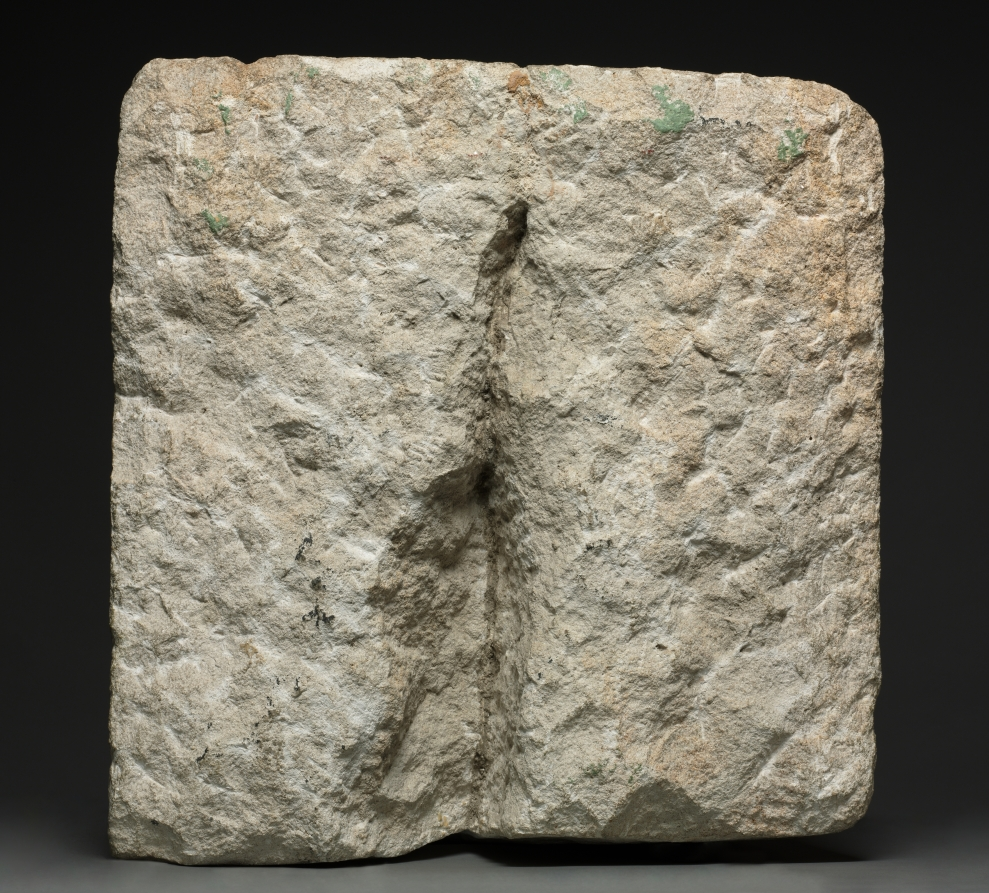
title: Engaged Capital with a Fantastic Creature and Three Birds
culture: Western France, Bordelais, early 12th century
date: early 1100s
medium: limestone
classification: Sculpture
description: The closest parallels for the dramatic, heavy style of this capital appear in the capitals of the porch of Saint-Seurin in Bordeaux.